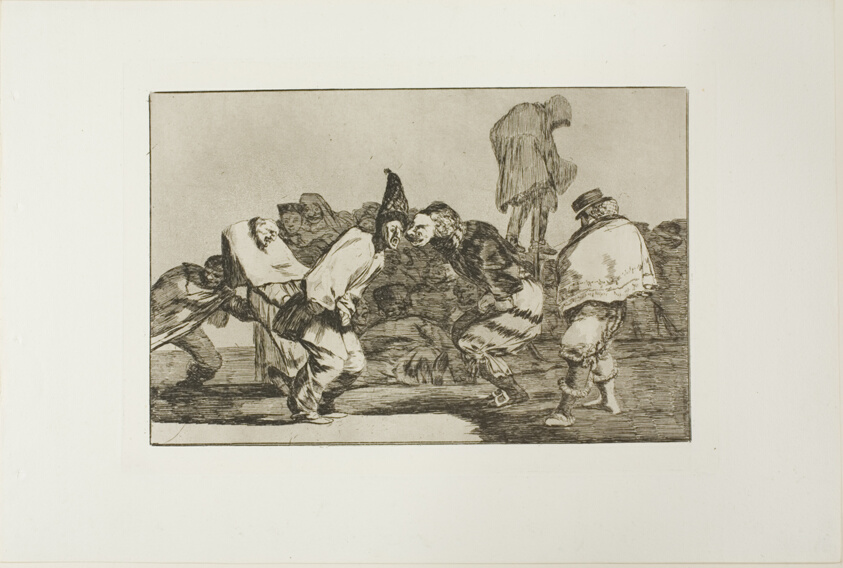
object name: Print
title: Rejoice, Carnival, for Tomorrow Thou wilt Be Ashes, plate 14 from Los Proverbios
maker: Francisco José de Goya y Lucientes (Spanish, 1746-1828)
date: 1815/24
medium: Etching and aquatint on ivory wove paper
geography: Spain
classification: etching; print; prints and drawing